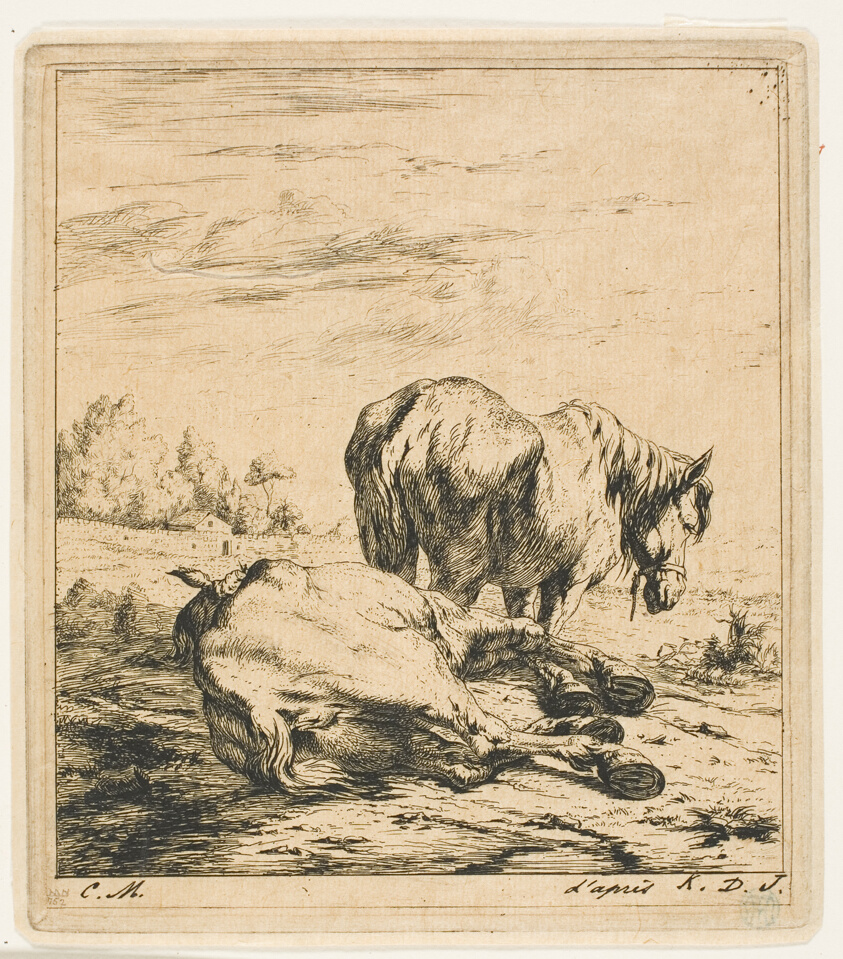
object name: Print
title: The Two Horses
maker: Charles Meryon (French, 1821-1868); after Karel Dujardin (Dutch, c.1622-1678)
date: 1850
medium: Etching and drypoint on tan wove paper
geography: France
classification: etching; print; prints and drawing